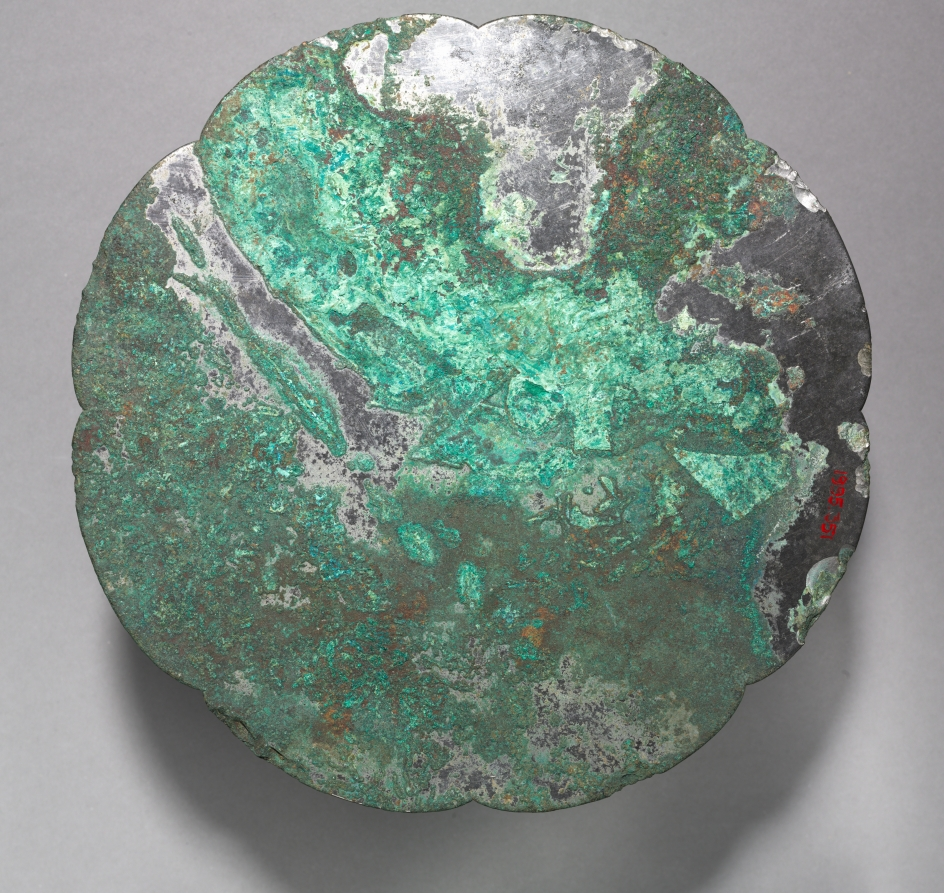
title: Lobed Mirror with Heaven and Earth between the Paired Phoenixes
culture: China, Tang dynasty (618-907)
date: mid to late 700s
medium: bronze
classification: Metalwork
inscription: 上圓下方，象于天地。 中列八填，備著陰陽。 辰星鎮定，日月貞明。 周流為水，以名四瀆。 內置連山，以旌王岳。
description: This mirror bears an important inscription as well as symbolic imagery of the Eight Trigrams and Heaven and Earth to express the ancient Chinese cosmological ideas. The inscription reads: Circle above and square below: These are symbolic of heaven and earth. In the middle are the Eight Trigrams. Making clear [the forces of] yin and yang. Stars and constellations are well aligned; The sun and the moon are virtuous and bright. Circulating around [the earth] is water, Giving identity to the Four Great Rivers. Within are the mountain ranges, To signify the lordly heights.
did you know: This mirror contains cosmological symbolism with heaven represented by a large circle at top and earth by a square at bottom.